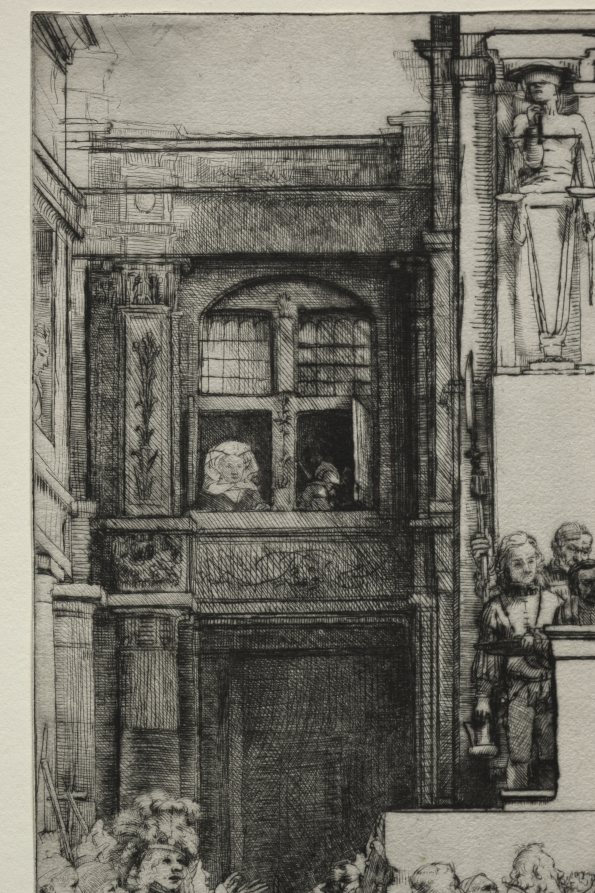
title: Ecce Homo. Christ Presented to the People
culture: Netherlands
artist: Rembrandt van Rijn (Dutch, 1606–1669)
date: 1655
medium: drypoint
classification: Print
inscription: Recto, upper left, in graphite: 79; lower left: FPS. Verso, in purple ink: Prince of Liechtenstein or Colnaghi for Liechtenstein stamp; in black ink, Zinser stamp, castle tower (rook chess piece); along side, in graphite: No. 36; along top: (illegible) name; upper left, in graphite: No 79 P(?) G (?) La Second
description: Rembrandt was an experimental and innovative printmaker and the first to execute works in pure drypoint on this monumental scale. Drypoint produces blurred lines and rich, velvety shadows, but these effects are lost as the plate wears. A limited number of rich impressions exist like this fine example of the fifth state, which demonstrates how Rembrandt redefined the expressive potential of printmaking. Rembrandt’s habit of drawing from life made him a keen observer of behavior and body language, endowing his biblical scenes with a human dimension and veracity not seen previously. The throng in Christ Presented to the People represents a cross section of the population and reflects the pictorial tradition that common humanity condemned Christ. Large areas of the imposing building, symbolizing the crushing weight and authority of the state, remain unworked so that blank white paper seems radiant in contrast to rich black shadows.